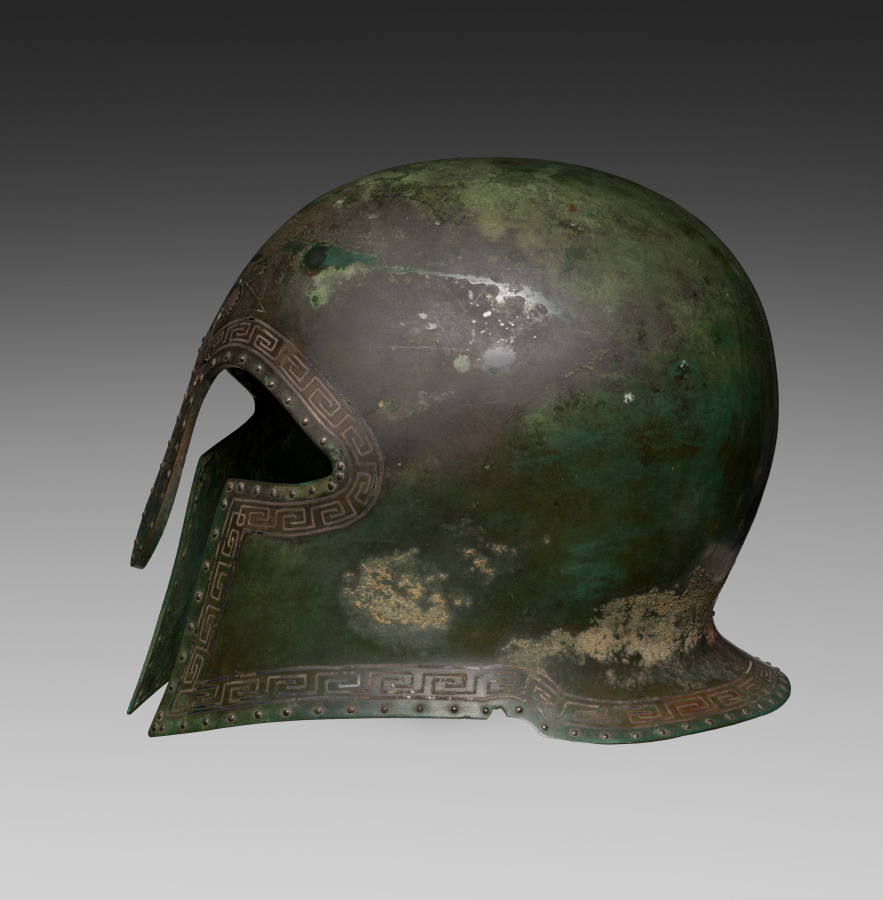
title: Corinthian Helmet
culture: Greece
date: 500–475 BCE or modern (before 1926)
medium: bronze with silver inlay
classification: Arms and Armor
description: Probably cast and then hammered into shape, this bronze helmet belongs to a type known as Corinthian, with almond-shaped eye holes, large cheekpieces, and a wide nose guard. Its significant weight raised early suspicions about authenticity, and although a 1928 technical examination found no conclusive evidence of forgery, scholars have continued to doubt its antiquity. Unusual details include the intact rivets, or metal fasteners, meant to secure liners; usually only their holes survive. The dueling warriors and inlaid palmette above the brow also find few parallels, and the silver meander pattern is unique. Most recently, a 2024 analysis found that both the copper and silver alloys of the helmet differ significantly from those expected in an ancient Greek helmet.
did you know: This helmet is very heavy—2.56 kilograms (5 lbs., 10 oz.), compared to average ancient helmets of 1.2–1.6 kilograms (about 3 lbs.).